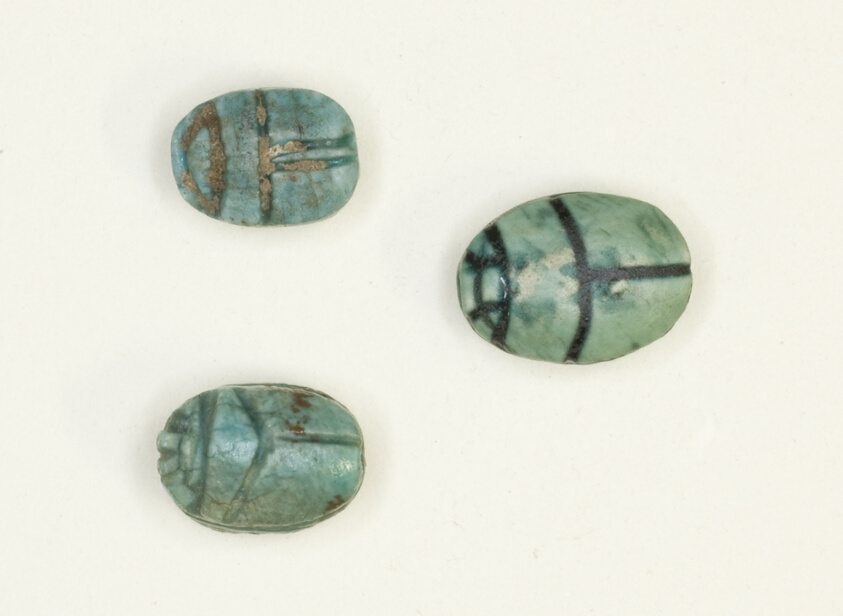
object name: Costume and Accessories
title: Scarabs with Inscriptions on Base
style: egyptian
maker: Egyptian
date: Early Middle Kingdom–New Kingdom, Dynasties 11–20 (about 2055–1069 BCE)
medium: Glazed steatite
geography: Egypt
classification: faïence; ceramics; scarab; ancient art; costume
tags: scarab beetle, Hieroglyphs